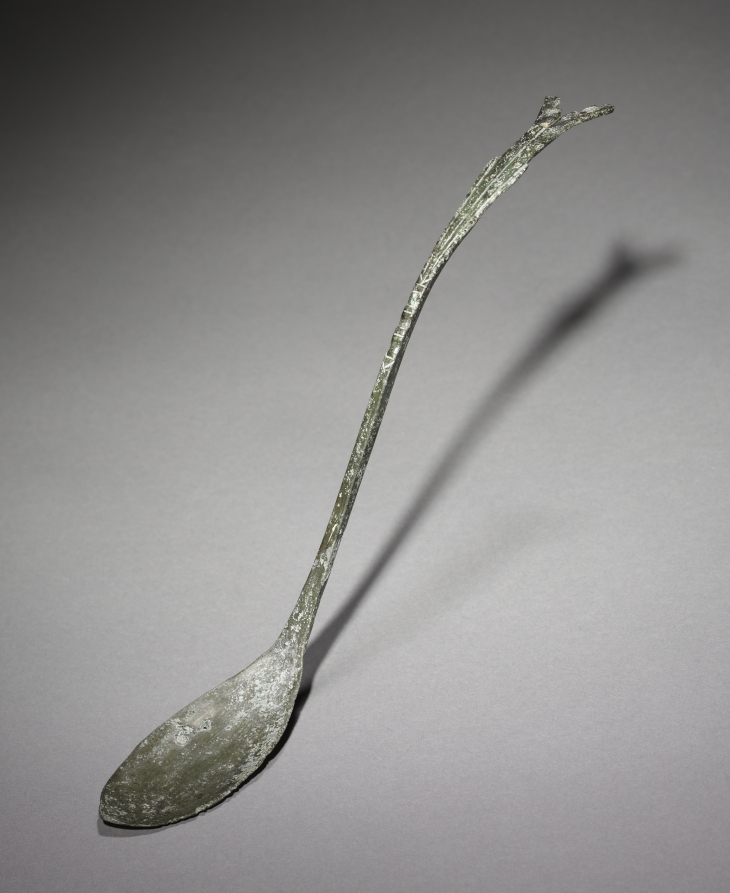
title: Spoon with Fish-Tail Design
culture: Korea, Goryeo dynasty (918–1392)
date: 918–1392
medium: bronze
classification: Metalwork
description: Many of Goryeo period spoons like this one feature a curved handle that splits into a jagged fishtail design. This fishtail design is not unique to Korea; it was also widely used in the area under the rule of two non-Han Chinese states: Liao (907–1125) and Jin (1115–1234). These seemingly ordinary objects testify to exciting material interactions between the Goryeo dynasty and non-Han Chinese northern states, which were often omitted from the official records.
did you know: Bronze spoons are the most common burial item. Scholars have proposed that toward the end of the 1300s, Koreans enjoyed meat-based soups more than any other dishes, explaining why spoons became common household items as well as burial goods.